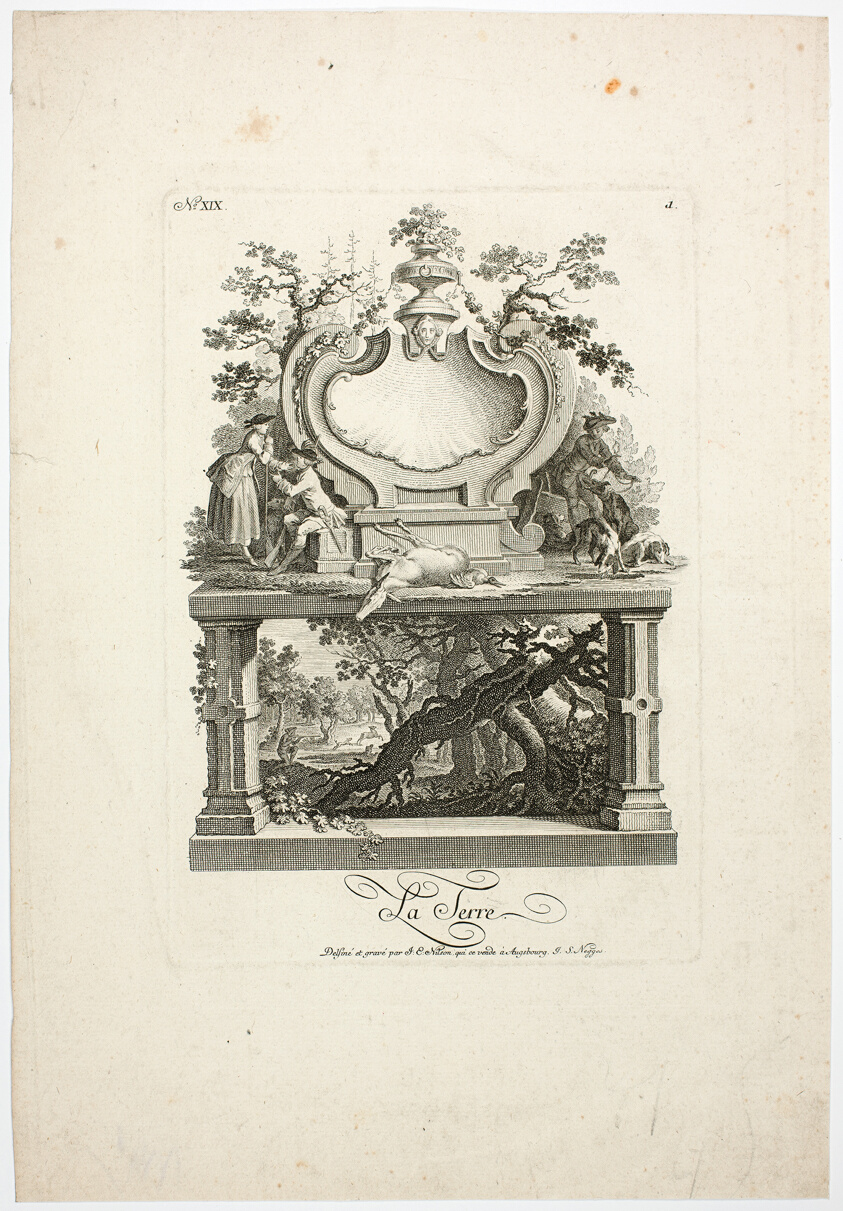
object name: Print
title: Earth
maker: Johann Esaias Nilson (German, 1721-1788)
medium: Etching and engraving on ivory laid paper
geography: Germany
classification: etching; print; prints and drawing